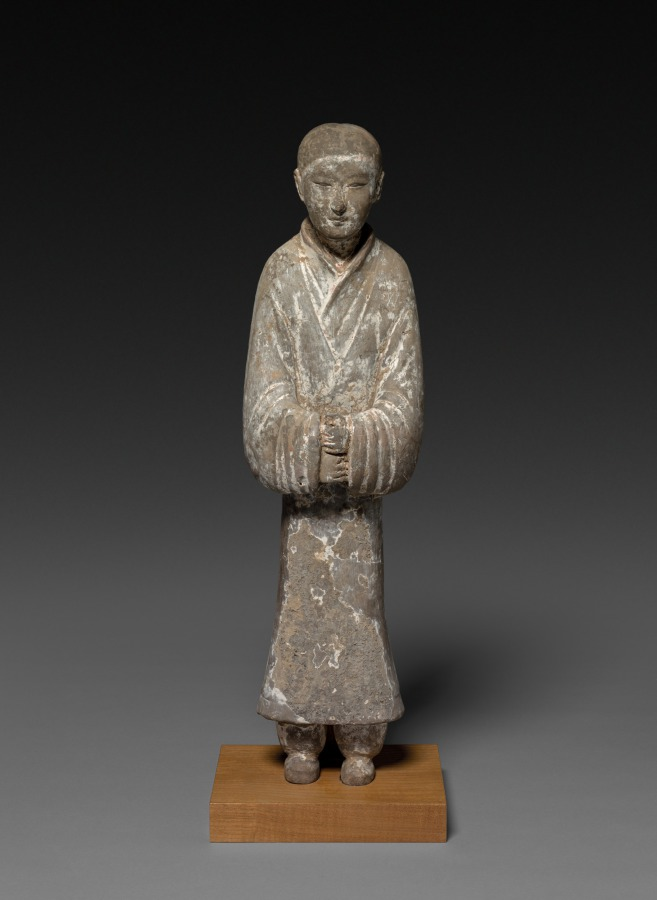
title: Female Attendant (Tomb Figurine)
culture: China, probably Shaanxi province, Western Han dynasty (206 BCE–8 CE)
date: 200s BCE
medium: gray earthenware with slip coating and traces of polychromy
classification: Sculpture